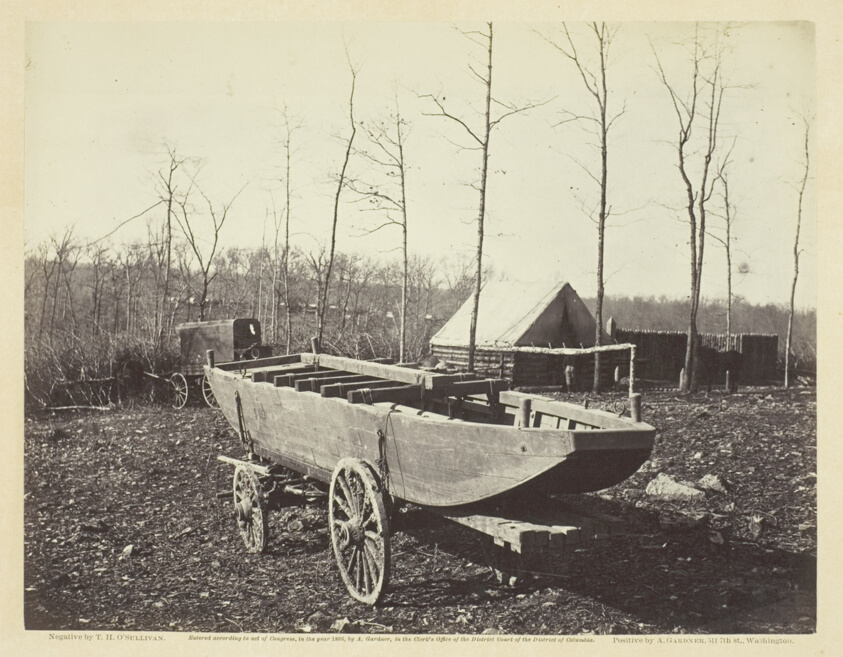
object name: Photograph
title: Pontoon Boat, Brandy Station, Virginia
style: 19th century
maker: Timothy O'Sullivan (American, born Ireland, 1840–1882)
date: February 1864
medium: Albumen print, pl. 58 from the album "Gardner's Photographic Sketch Book of the War, Volume II" (1866)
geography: United States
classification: photograph; albumen silver print; photography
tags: Collected by Hugh Edwards, Gardner's Photographic Sketch Book